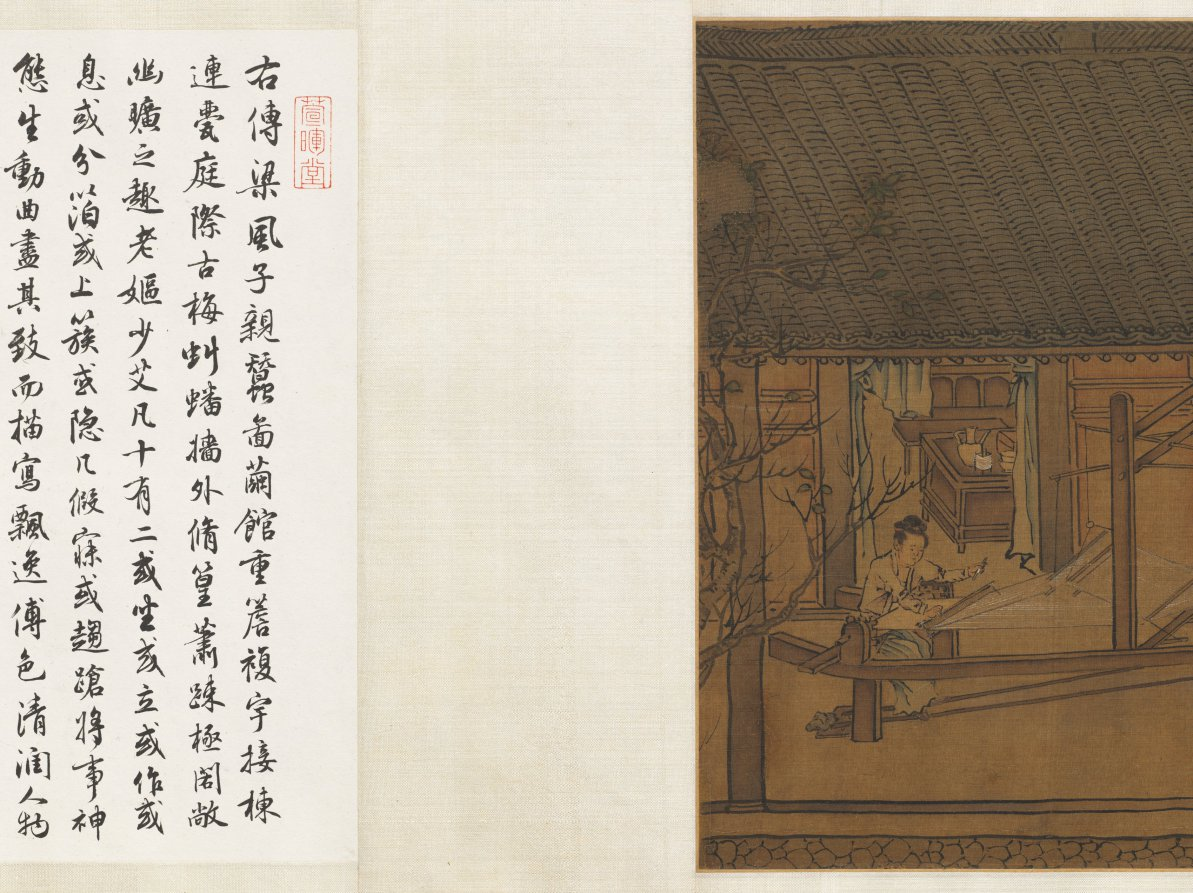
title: Sericulture (The Process of Making Silk)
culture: China, Southern Song dynasty (1127-1279)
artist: attributed to Liang Kai (Chinese, mid-1100s–early 1200s)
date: early 1200s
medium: Handscroll; ink and color on silk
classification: Painting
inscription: 3 colophons and 7 seals of Ch'eng Ch'i (20th c.).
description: By the Southern Song period, the economic center of the silk industry had shifted to the lower Yangzi delta, while the north continued to be troubled by wars. Divided into three sections, the handscroll illustrates 14 steps in the process of making silk, from the raising of silkworms to the weaving of silk cloth. The scroll’s scenes follow the illustrations of Lou Shou’s (1090–1162) Pictures of Tilling and Weaving (gengzhi tu), the first recorded painting of this genre, which was conceived in Hangzhou around 1145. However, in the Cleveland painting the artist groups several scenes of sericulture together under the roof of an open structure.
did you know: The painting is attributed to Liang Kai, a court artist active from about 1201 to 1204 at the Imperial Painting Academy in the city of Hangzhou, a major silk weaving center from that time to the present day.